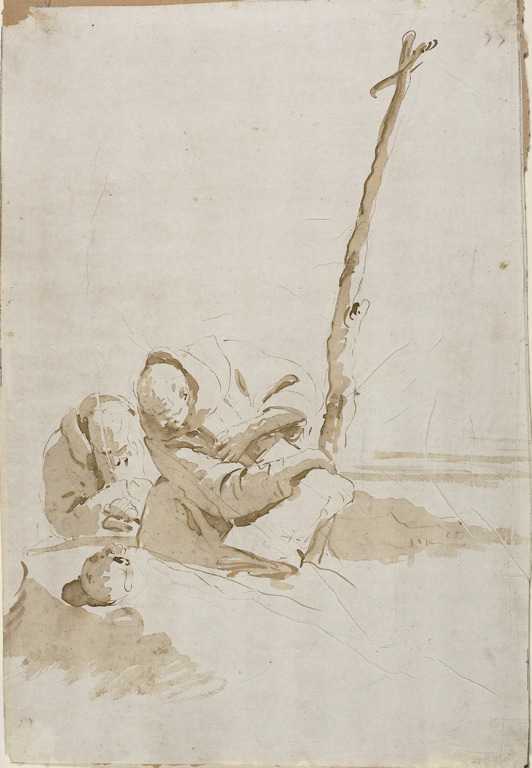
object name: Drawing and Watercolor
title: Two Monks Contemplating a Skull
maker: Giovanni Battista Tiepolo (Italian, 1696–1770)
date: c. 1730–35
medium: Brush and brown ink and brush and brown wash, over traces of black chalk, on ivory laid paper, laid down on tan wove paper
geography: Italy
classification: ink or chalk wash; drawings (visual works); prints and drawing